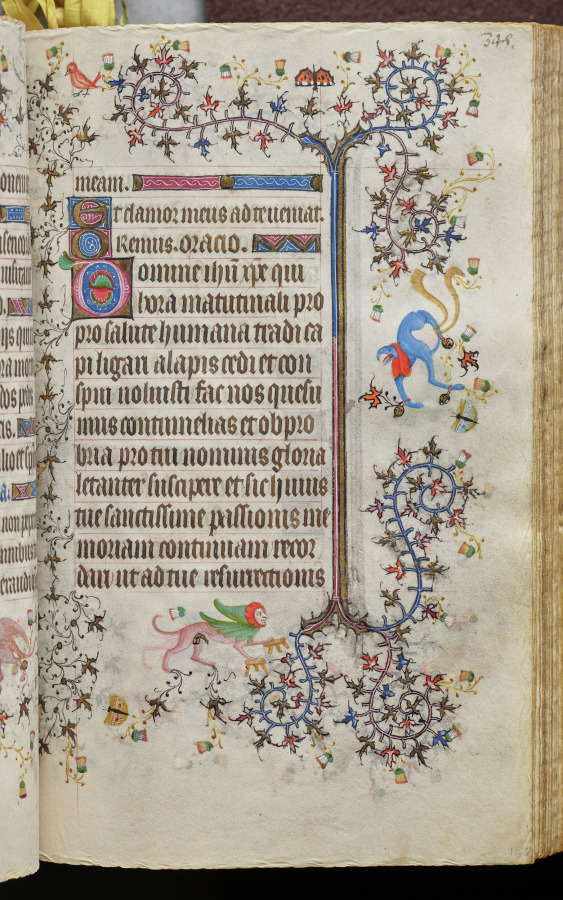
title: Hours of Charles the Noble, King of Navarre (1361-1425): fol. 168r, Text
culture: France, Paris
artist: Master of the Brussels Initials and Associates (French)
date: c. 1405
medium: ink, tempera, and gold on vellum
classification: Bound Volume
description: This precious volume was obviously highly prized by its owner, the French-born King of Navarre, who had his coat of arms painted on no less than twenty folios. Rather than directly commissioning this manuscript from a specific workshop, it seems that Charles the Noble acquired his book of hours -- perhaps ready-made for the luxury market -- while on a trip to Paris in 1404-05. A collaborative effort, six painting styles are evidenced within the pages of this codex, those of two Italians, two Frenchmen, and two Netherlanders. The painter who was responsible for the planning and decoration of the book, and who produced seventeen of the large miniatures, was a Bolognese artist known as the Master of the Brussels Initials. His principal assistant, responsible for most of the borders, was a Florentine who signed his name "Zecho" da Firenze on folio 208 verso.